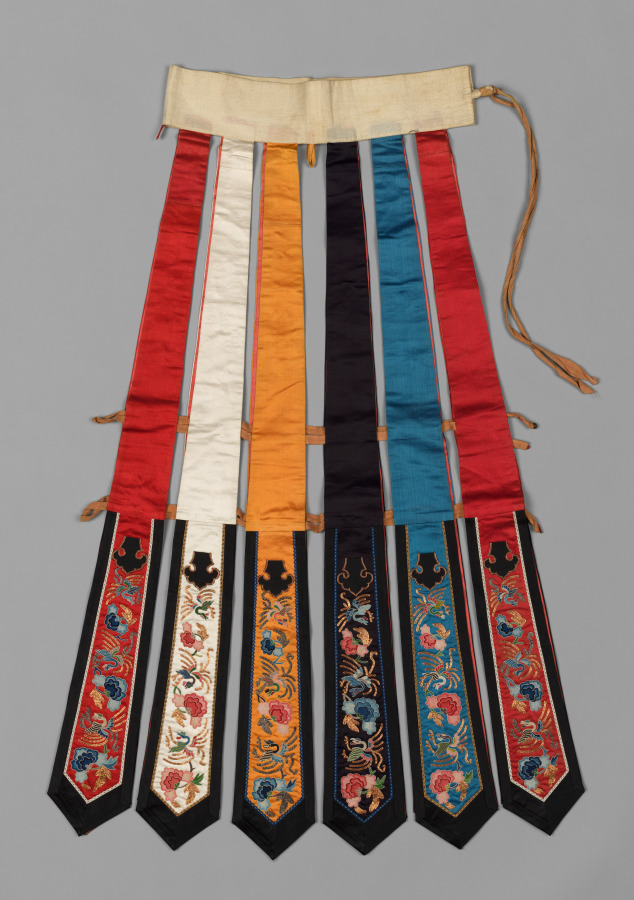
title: Rainbow Skirt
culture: China, Qing dynasty (1644-1911)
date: late 1800s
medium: Silk: embroidery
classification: Garment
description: This bridal garment is referred to as a rainbow skirt. Originally jingling bells hung from the ends of each strip.